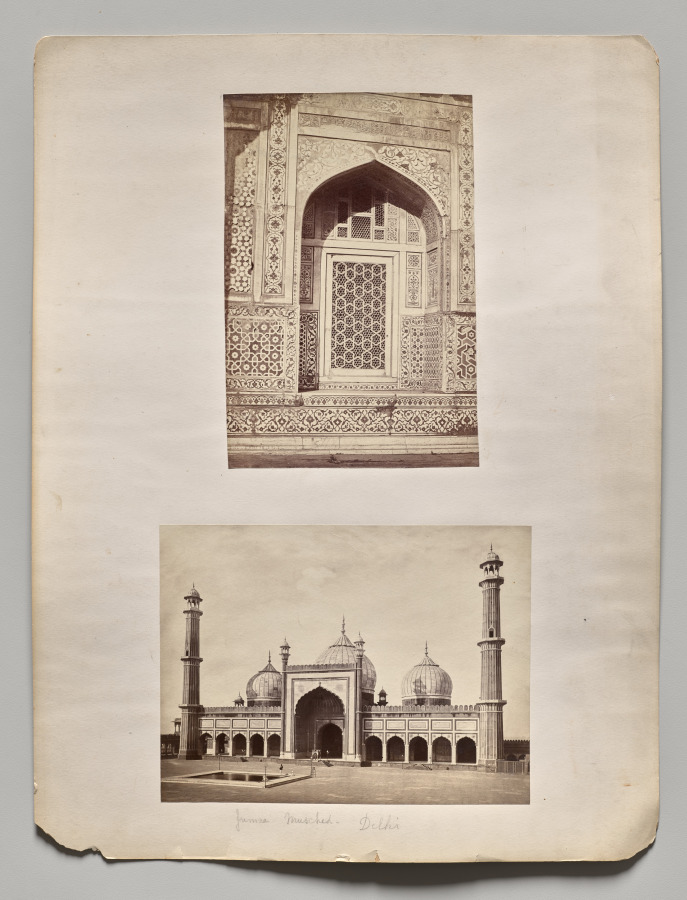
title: Untitled (Jama Masjid, Delhi)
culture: England, 19th century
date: 1870s (?)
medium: albumen print mounted on an album page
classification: Photograph